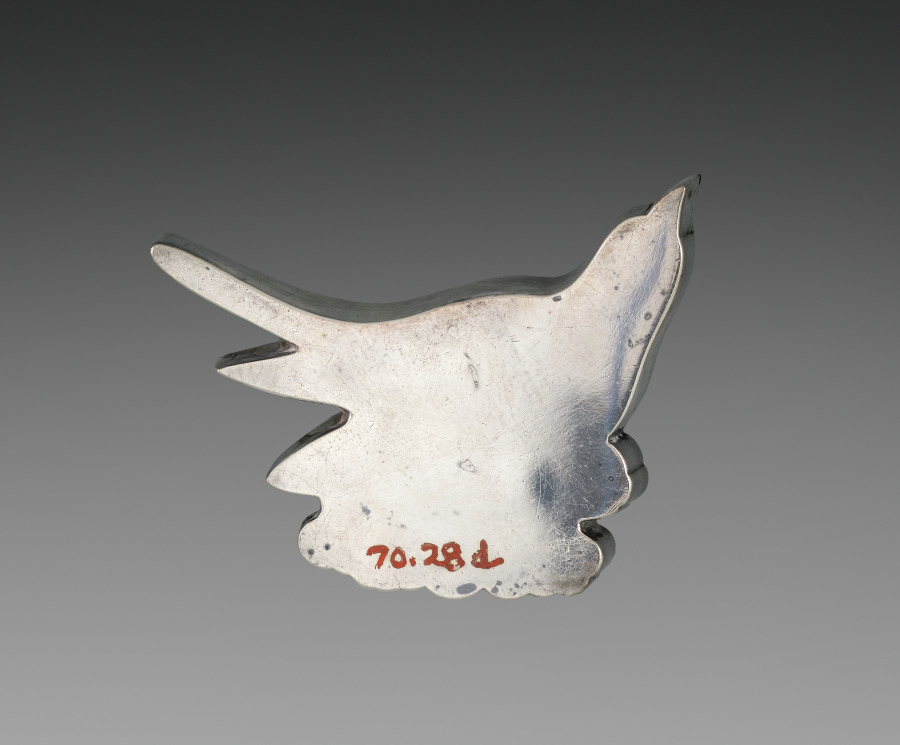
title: Writing Box (Suzuribako) with the “First Song” (Hatsune) Chapter from the Tale of Genji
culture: Japan, Meiji period (1868–1912)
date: early 1900s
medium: Lacquered wood with gold and silver sprinkled powder (maki-e), foil application (kirikane), and metal inlay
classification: Lacquer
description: The design of this box was inspired by an object in the 1639 lacquer wedding set of Chiyohime, the daughter of the shogun (ruler). Information about the set became available in the Meiji period, leading some lacquer artists to emulate its designs. This box features a scene from the chapter “First Song” (Hatsune) of the Tale of Genji, in which Prince Genji and his love Murasaki enjoy her garden. It incorporates the written characters for “first” (初, hatsu) and “sound” (音, ne), indicating the first song of the warbler in spring, associated with the new year—the water dropper for mixing the ink is in the shape of this bird.